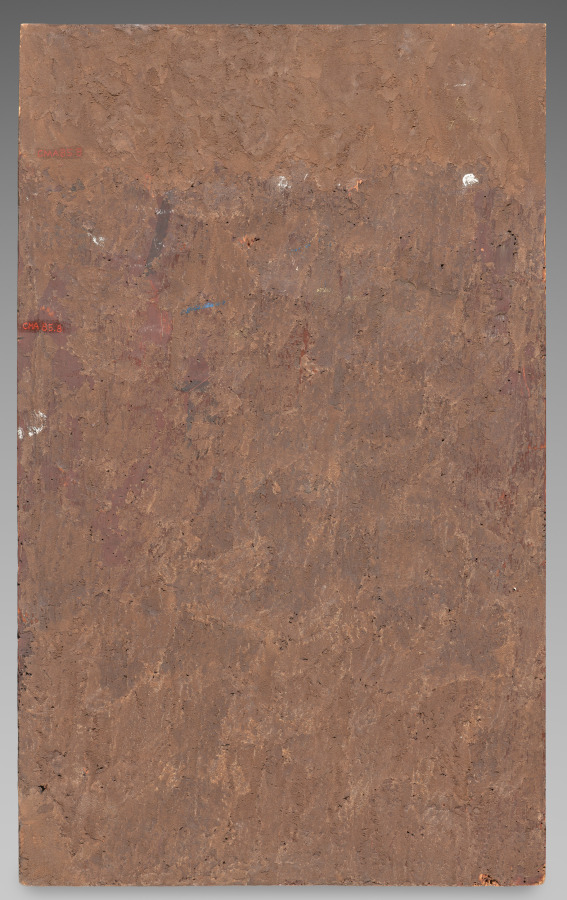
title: Madonna and Child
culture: Italy, Florence, active in Spain, late 14th-early 15th century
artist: Gherardo Starnina (Italian, c. 1360–before 1413)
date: c. 1400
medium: oil and gilding on wood panel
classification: Painting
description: Although Gherardo Starnina is regarded as one of the most important painters of his time in Florence, little is known about him. He probably studied with a well-regarded Florentine painter who made numerous frescoes. He is claimed to have participated in the painting of the frescoes in the Castellani Chapel in Santa Croce, Florence. Documents show that he worked extensively in Spain, specifically Toledo and Valencia, executing many panel paintings and frescoes there. Most of his known paintings are altarpieces, often illustrating scenes from the lives of the saints. Stylistically, Starnina drew from many sources, including the Late Gothic style he witnessed while in Spain, and he developed a uniquely independent, progressive manner. The lyrical grace of this Madonna and her Valencian-style crown owe much to his experience in Spain.